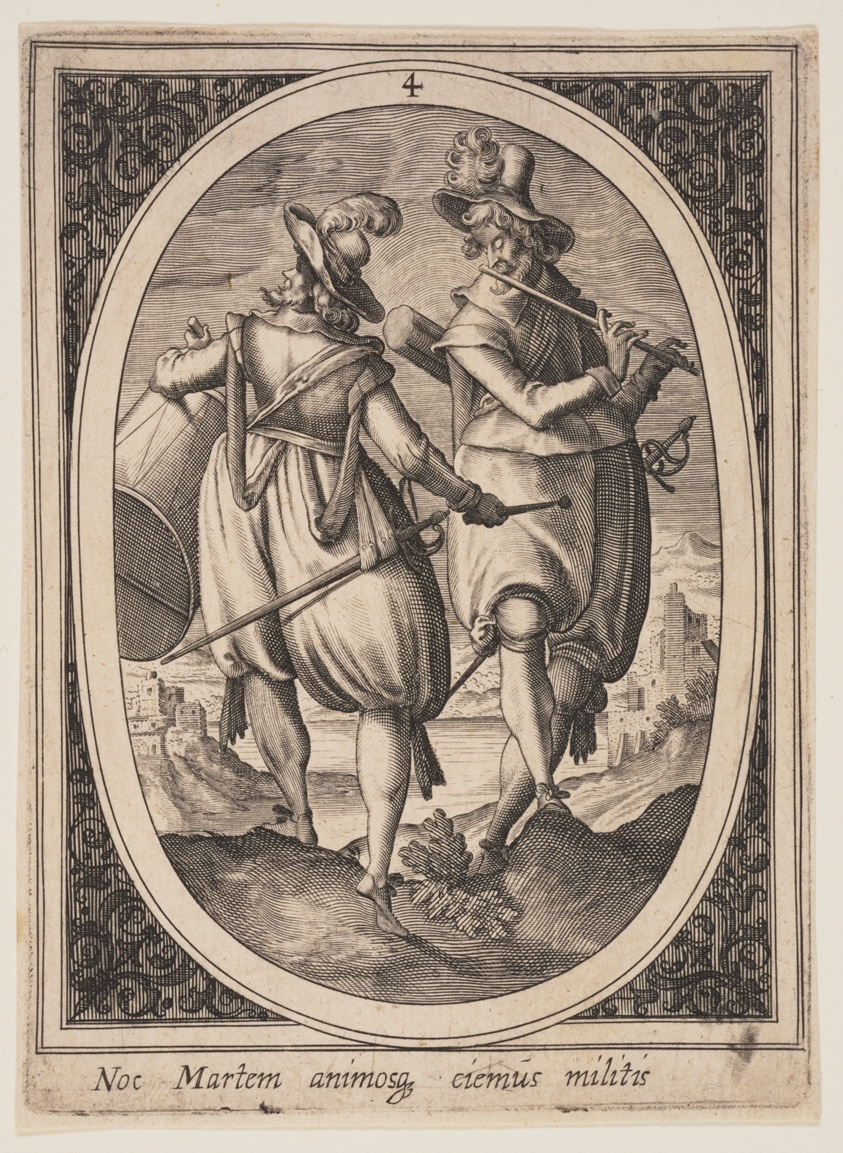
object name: Print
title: Plate 4 from Military Figures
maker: Attriuted to Heinrich Ulrich (German, c. 1572-1621); possibly after Paul Mair (German, active c. 1600)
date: c. 1590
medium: Engraving on ivory laid paper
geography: Germany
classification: engraving; paper; print; prints and drawing